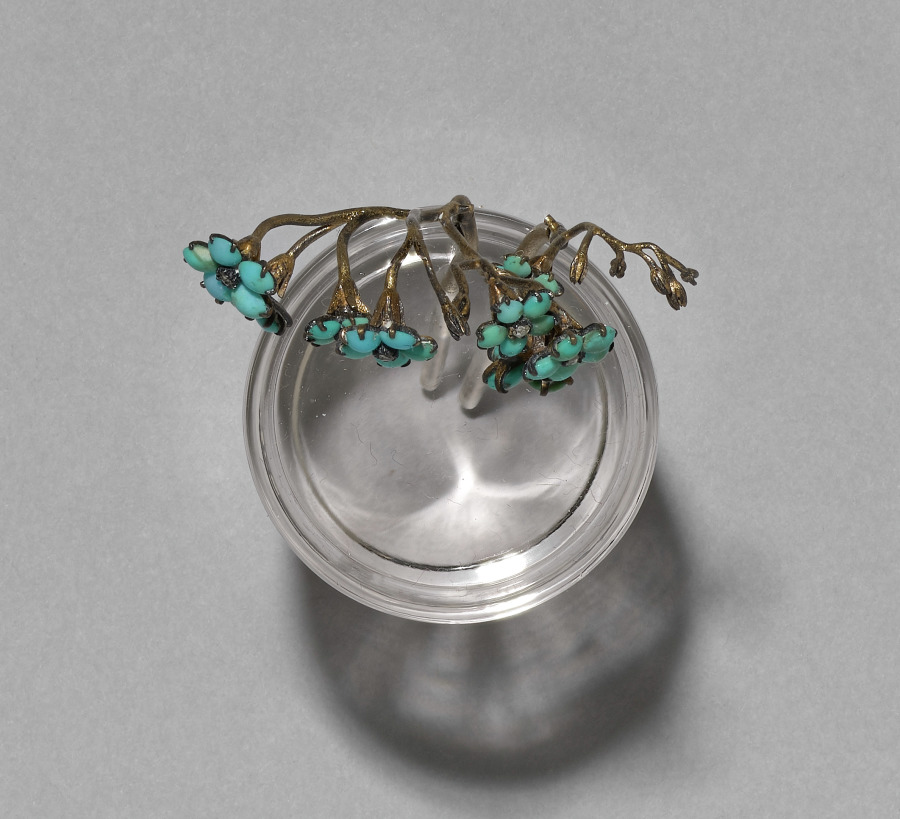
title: Flower Study of Forget-Me-Nots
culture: Russia, St. Petersburg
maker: House of Fabergé (Russian, 1842–1918)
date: c. 1885–1915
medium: turquoise, diamonds, rock crystal, silver gilt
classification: Miscellaneous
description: These delicate flowers, resembling a bouquet of forget-me-nots, are composed of finely rounded turquoise stones set around rose-cut diamonds on silver-gilt stems placed in rock crystal pots. Fabergé’s inspiration for his flower studies is said to have come from the floral brooches of precious stones that were made in the 1700s for Catherine the Great as well as from the Japanese art of flower arranging, known as ikebana. Fabergé’s flower studies were given as intimate gifts to friends by the tsarina and others in the court. She also liked to take them around to wherever the imperial family was residing as a reminder of spring during the harsh Russian winters.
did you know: The stems of Fabergé’s flower studies are set into little basins carved from rock crystal to resemble pots of water.